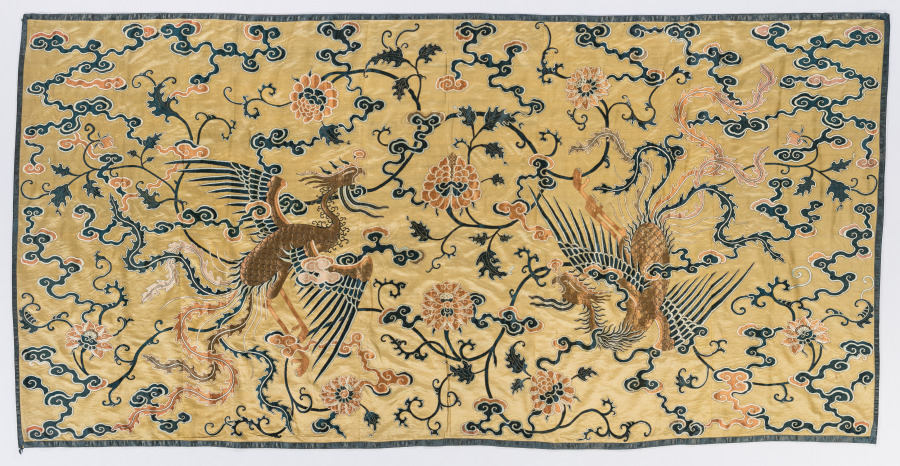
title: Wall Hanging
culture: China, Qing dynasty (1644-1911)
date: late 1700s–early 1800s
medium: Silk; satin weave ground with supplementary silk weft wool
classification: Textile